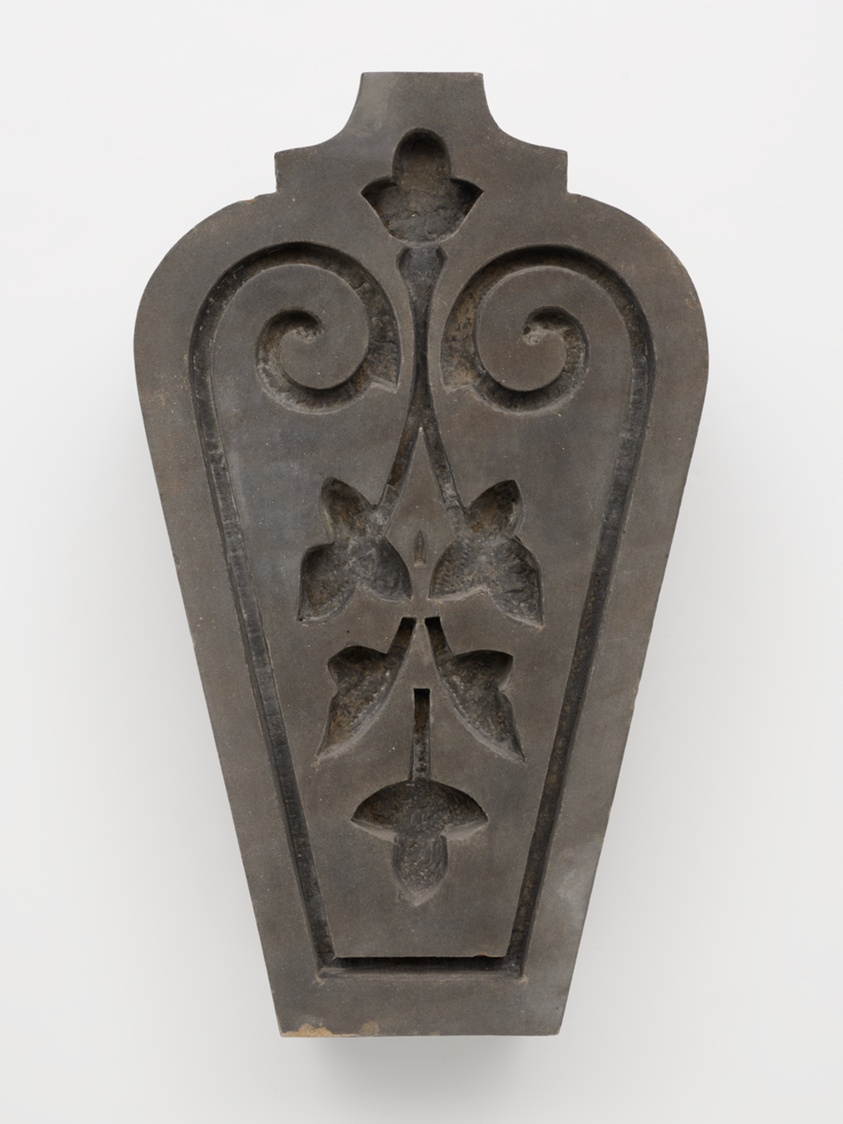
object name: Architectural fragment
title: Window Keystone from 223 W. Madison Street, Chicago, Illinois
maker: Architect Unknown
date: c. 1872 (demolished 1987)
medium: Limestone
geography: United States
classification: architectural fragment; architecture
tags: Chicago